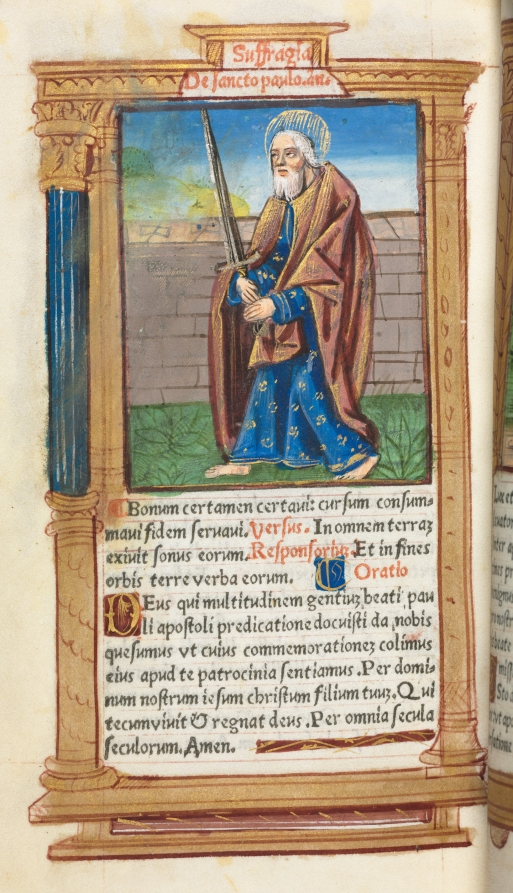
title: Printed Book of Hours (Use of Rome): fol. 99v, St. Paul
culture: France, Paris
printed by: Guillaume Le Rouge (French, Paris, active 1493–1517)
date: 1510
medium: 112 Printed folios on parchment, bound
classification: Bound Volume